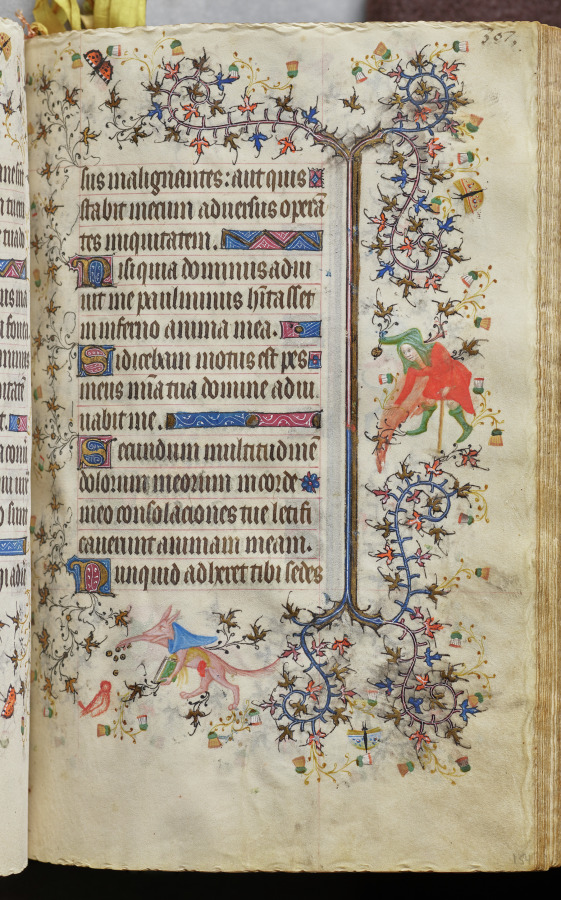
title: Hours of Charles the Noble, King of Navarre (1361-1425): fol. 154r, Text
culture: France, Paris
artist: Master of the Brussels Initials and Associates (French)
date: c. 1405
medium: ink, tempera, and gold on vellum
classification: Bound Volume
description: This precious volume was obviously highly prized by its owner, the French-born King of Navarre, who had his coat of arms painted on no less than twenty folios. Rather than directly commissioning this manuscript from a specific workshop, it seems that Charles the Noble acquired his book of hours -- perhaps ready-made for the luxury market -- while on a trip to Paris in 1404-05. A collaborative effort, six painting styles are evidenced within the pages of this codex, those of two Italians, two Frenchmen, and two Netherlanders. The painter who was responsible for the planning and decoration of the book, and who produced seventeen of the large miniatures, was a Bolognese artist known as the Master of the Brussels Initials. His principal assistant, responsible for most of the borders, was a Florentine who signed his name "Zecho" da Firenze on folio 208 verso.